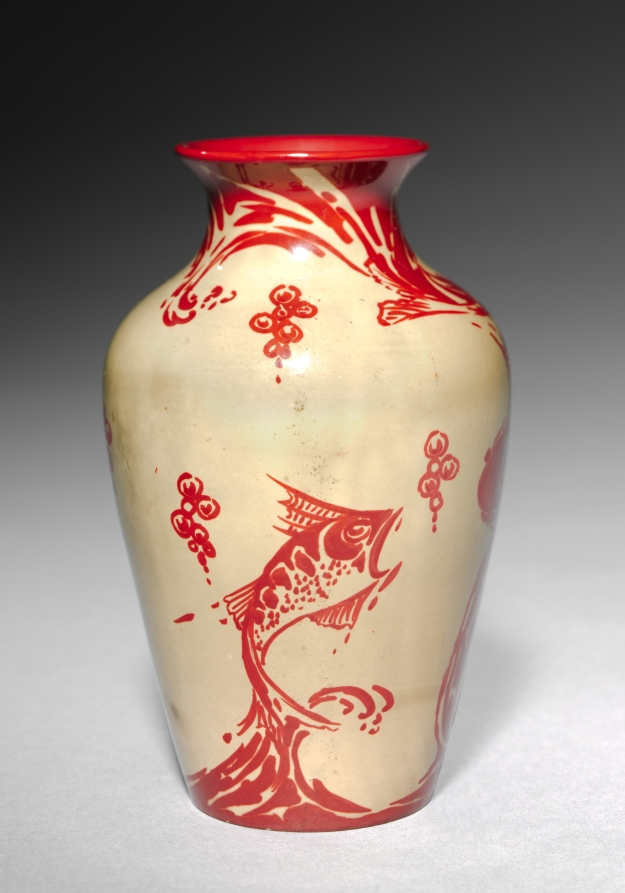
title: Vase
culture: England, 20th century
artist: Bernard Moore (British, 1850–1935)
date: c. 1900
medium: porcelain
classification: Ceramic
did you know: The designer Bernard Moore studied Asian and Islamic ceramics. He was especially interested in glazes like the vivid red one on this vase that resembles the color of oxblood.